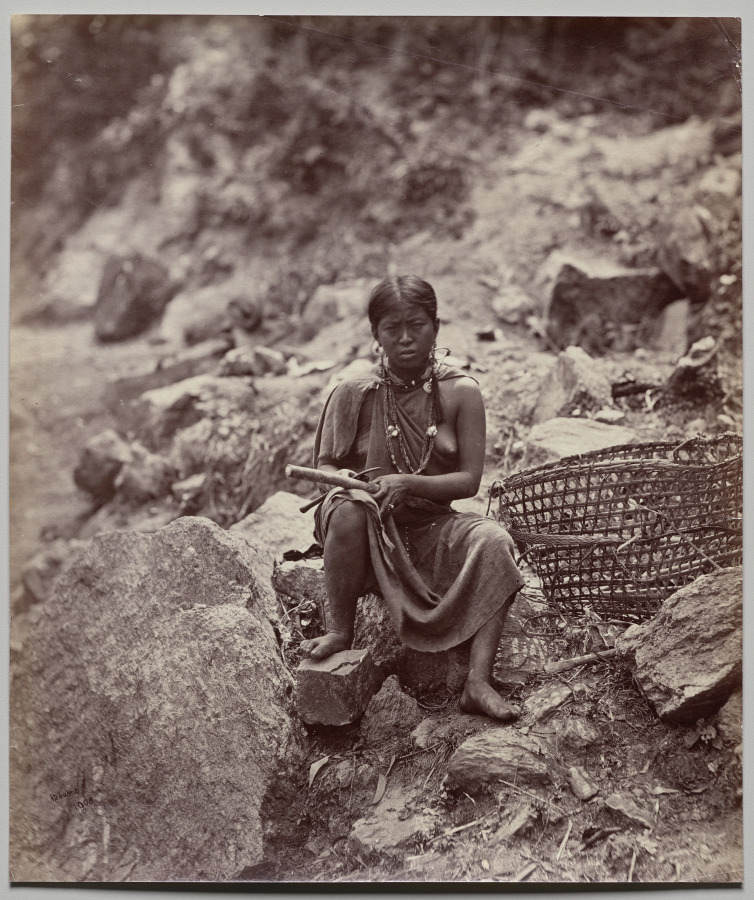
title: Lepcha Woman (number 1908)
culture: England, 19th century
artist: Samuel Bourne (British, 1834–1912)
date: c. 1863–70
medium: albumen print from wet collodion negative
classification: Photograph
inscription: Written in black ink on recto, lower left: “Bourne/1908”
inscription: Written in pencil on verso: “1908”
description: One of the most versatile and widely traveled early photographers of India was Samuel Bourne, recognized in his time and now for superb technical skills and artistic talent. While his predominant subject matters were landscape and architectural views, Bourne sometimes photographed the types of people he encountered on his travels throughout India.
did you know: The Lepcha people, also called the Rongkup, are indigenous to Sikkim, Darjeeling, and West Bengal in India, and to areas of Nepal and Bhutan.